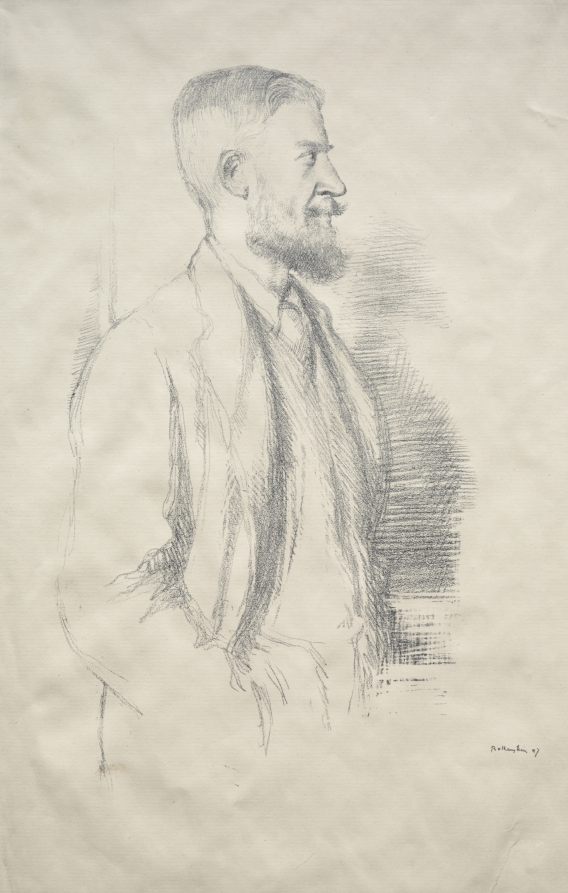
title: George Bernard Shaw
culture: England, 20th century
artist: William Rothenstein (British, 1872–1945)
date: 1897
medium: lithograph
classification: Print